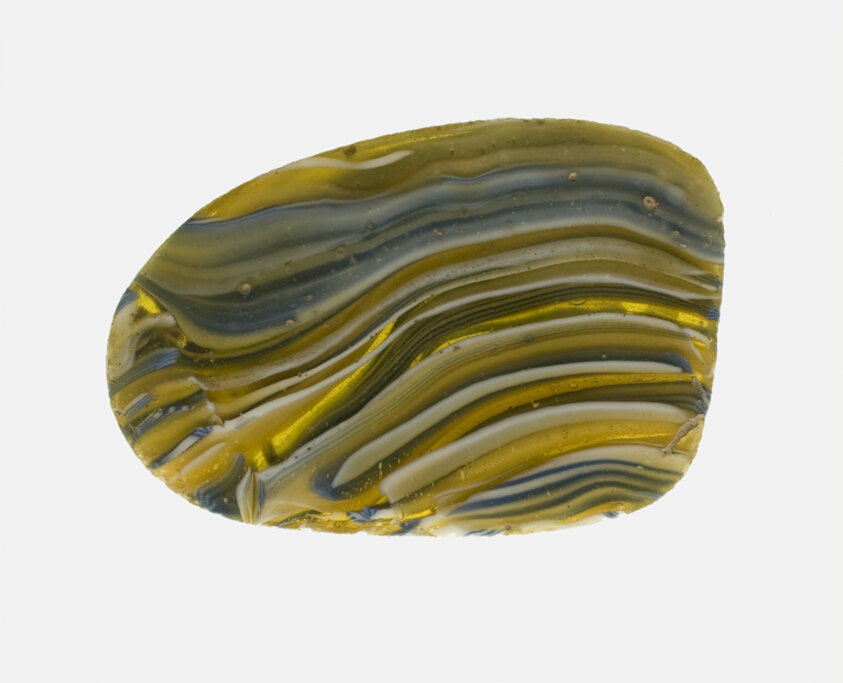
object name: Decorative Arts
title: Bowl Fragment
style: roman (ancient, style or period), ancient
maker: Roman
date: 1st century BCE-1st century CE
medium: Glass, ribbon technique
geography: Roman Empire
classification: fragment; bowl; decorative arts